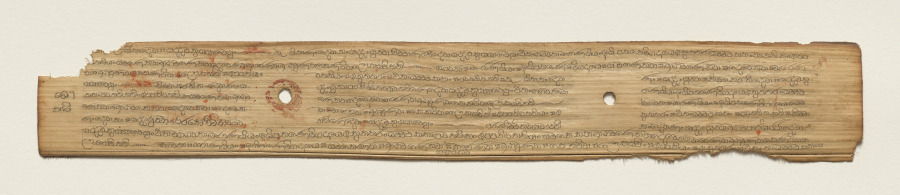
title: Leaf from a Buddhist Manuscript (recto)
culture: Sri Lanka, Singhalese, Late 17th century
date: c. 1700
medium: fiber paper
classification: Manuscript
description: Palm leaf material is still used for manuscripts in Sri Lanka. The palm leaves are prepared first by boiling them, drying them in the sun, and then rubbing them with oils. Scribes then use a metal stylus to incise the text. Then charcoal powder is wiped across the pages, filling in only the inscribed lines.